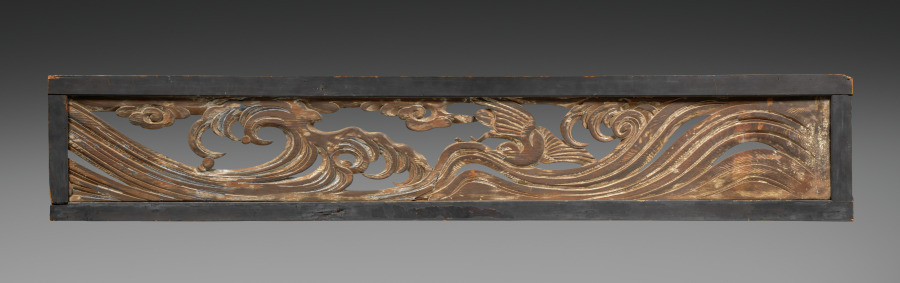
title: Chidori and Waves (ramma)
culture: Japan, Edo period (1615–1868)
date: c. 1700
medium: wood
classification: Wood